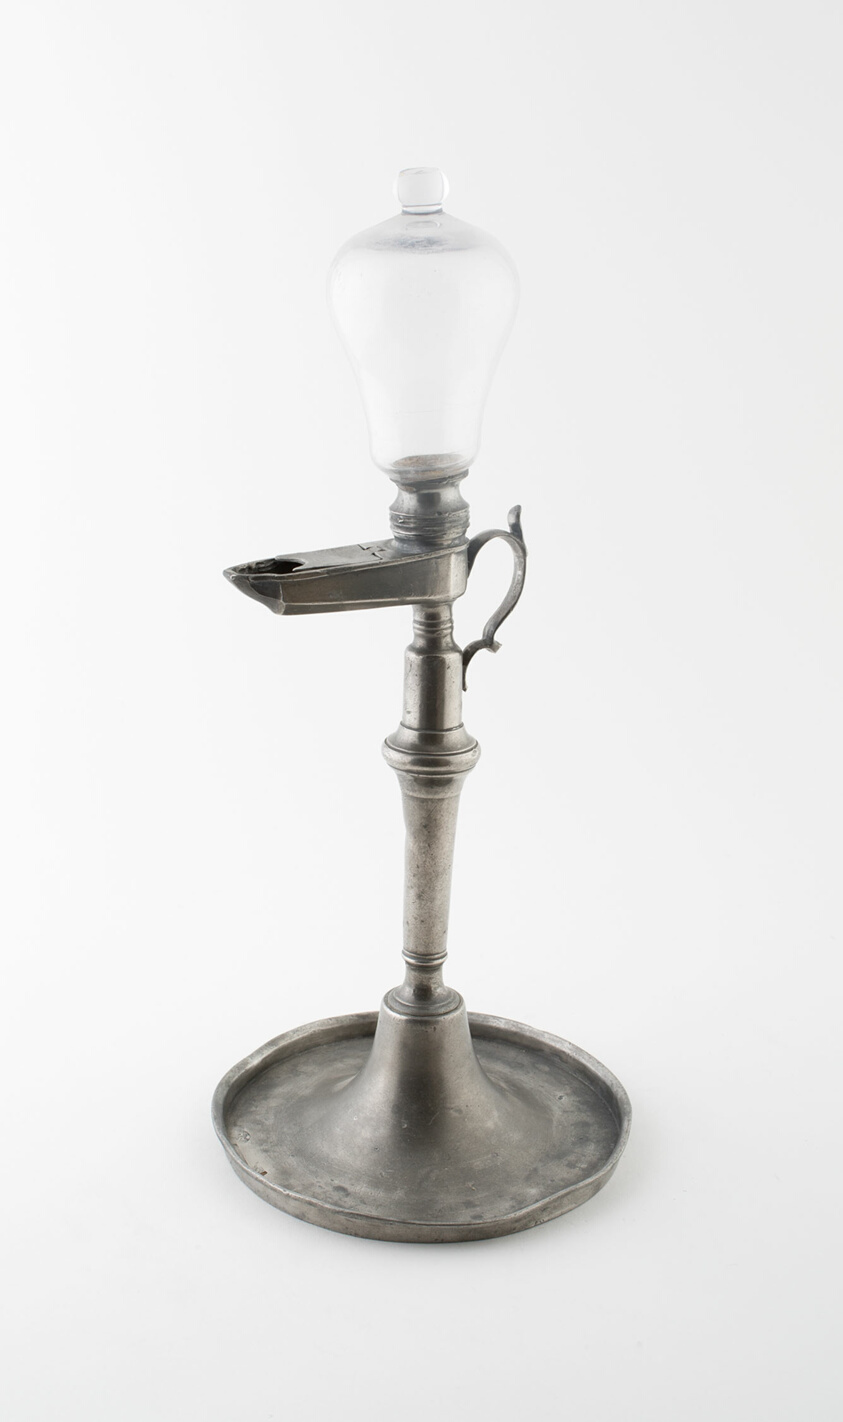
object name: Metalwork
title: Oil Lamp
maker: Germany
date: c. 1800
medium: Pewter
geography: Germany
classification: pewter; metalwork; european decorative arts